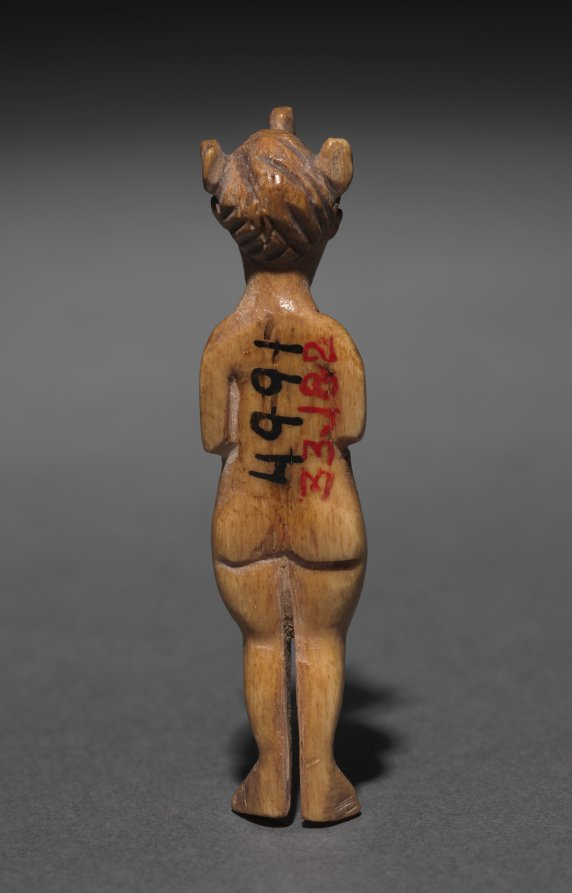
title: Figurine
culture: Parthian Empire (247 BCE–224 CE)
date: 1–200 CE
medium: bone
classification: Sculpture